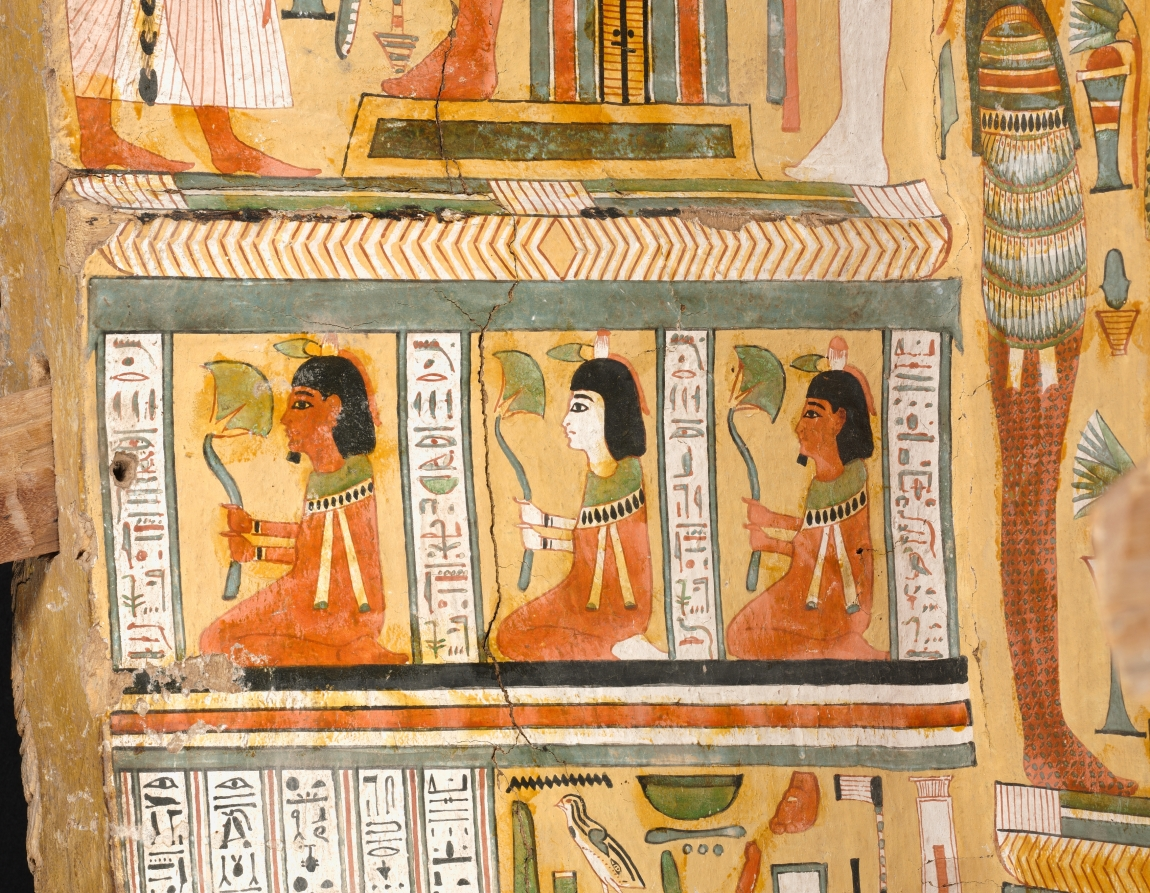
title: Coffin of Nesykhonsu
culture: Egypt, Thebes, Third Intermediate (1069–715 BCE), Dynasties 21–22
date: c. 976–889 BCE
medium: gessoed and painted sycamore fig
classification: Funerary Equipment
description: Egyptian coffins told stories and illustrated spells to help the deceased transition safely to the afterlife. Inside Nesykhonsu's coffin there are two jackals, one facing right and the other left, near the top. Here, the jackal represents the powerful deity Anubis, the god of the afterlife and embalming.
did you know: Two of Nesykhonsu's titles, "Lady of the House" and "Singer of the Choir of Mut the Great," are written on the outside of the coffin.